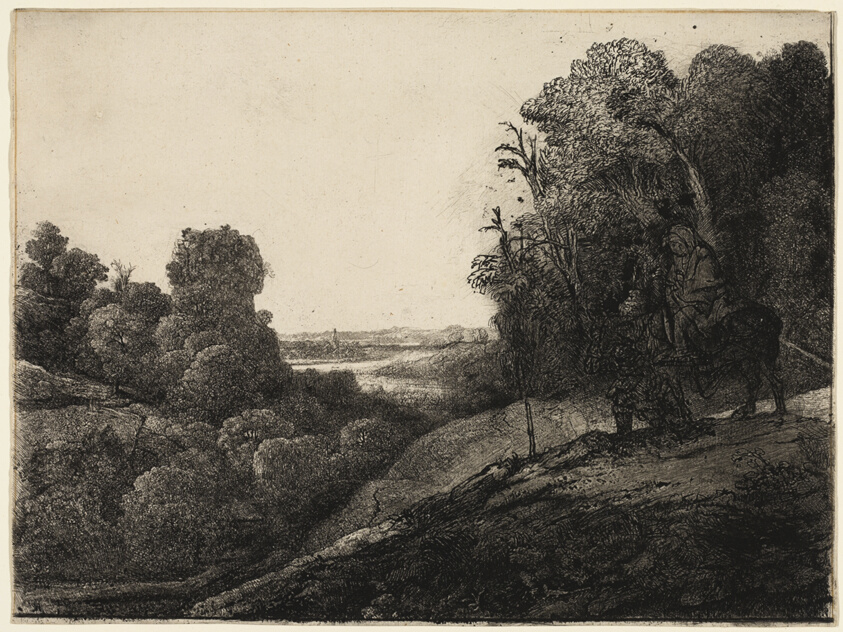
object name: Print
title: The Flight into Egypt: Altered from Seghers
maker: Rembrandt van Rijn (Dutch, 1606-1669)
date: c. 1652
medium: Etching, burin, and drypoint on ivory laid paper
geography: Holland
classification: etching; print; prints and drawing; paper; drypoint; burin